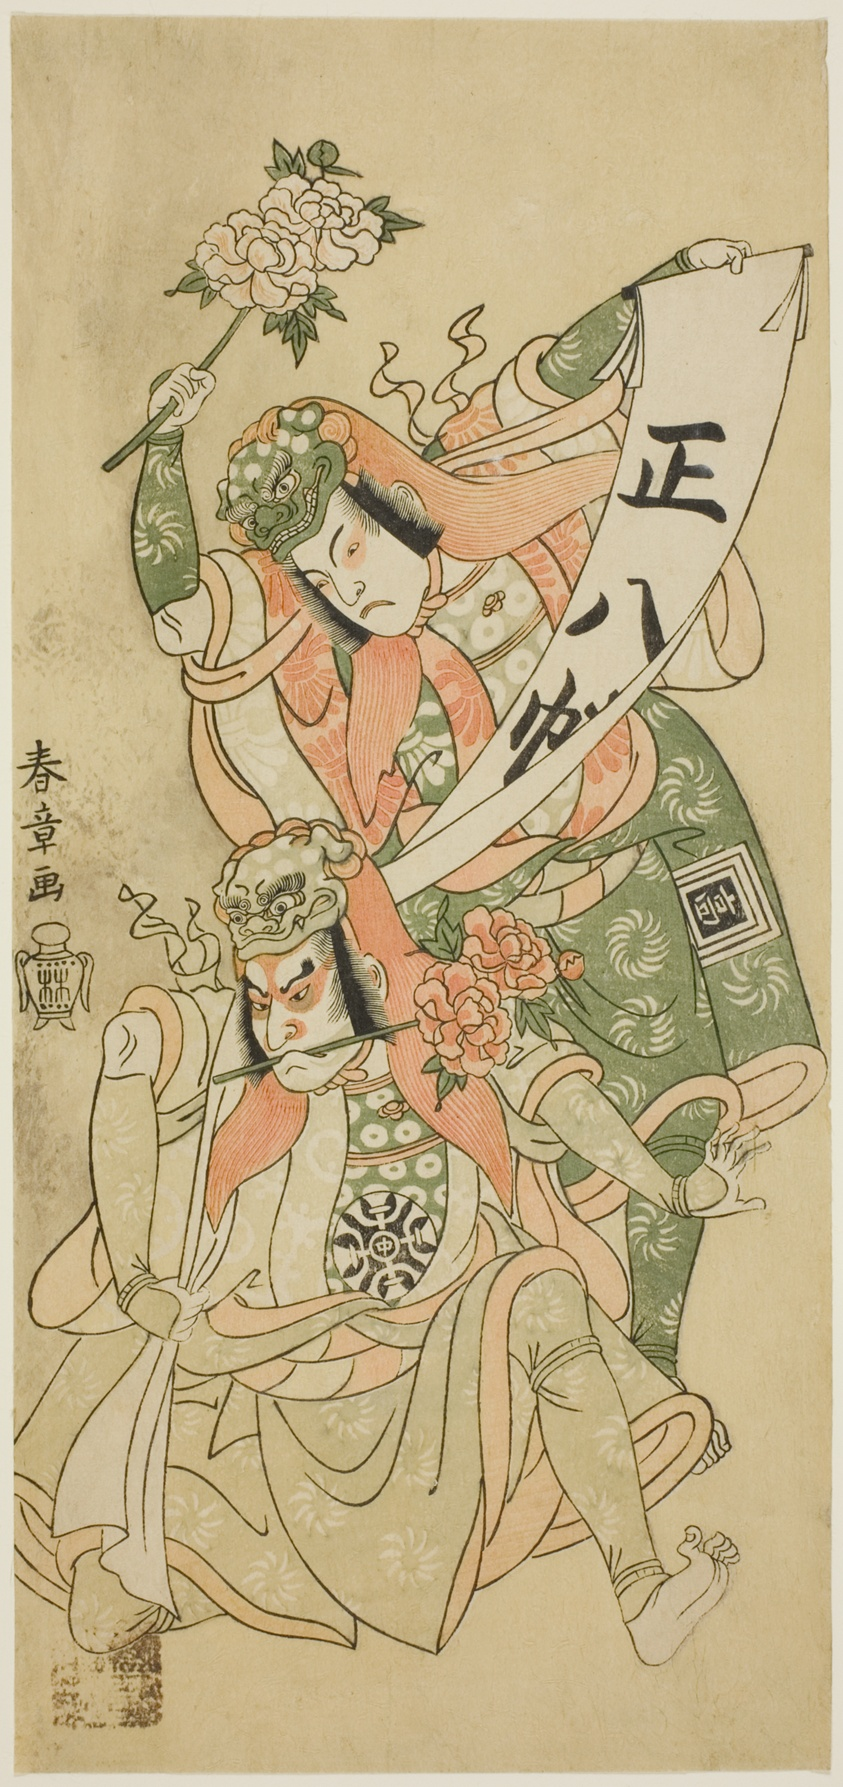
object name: Print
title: Actors Nakamura Nakazô I and Ichikawa Komazô I in “The Genji Clan Now at Its Zenith” (“Ima o sakari suehiro Genji”)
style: Japanese (culture or style)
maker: KKatsukawa Shunshô 勝川 春章; Japanese, 1726-1792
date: About 1768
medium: Color woodblock print; hosoban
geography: Japan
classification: woodblock print; print; asian art